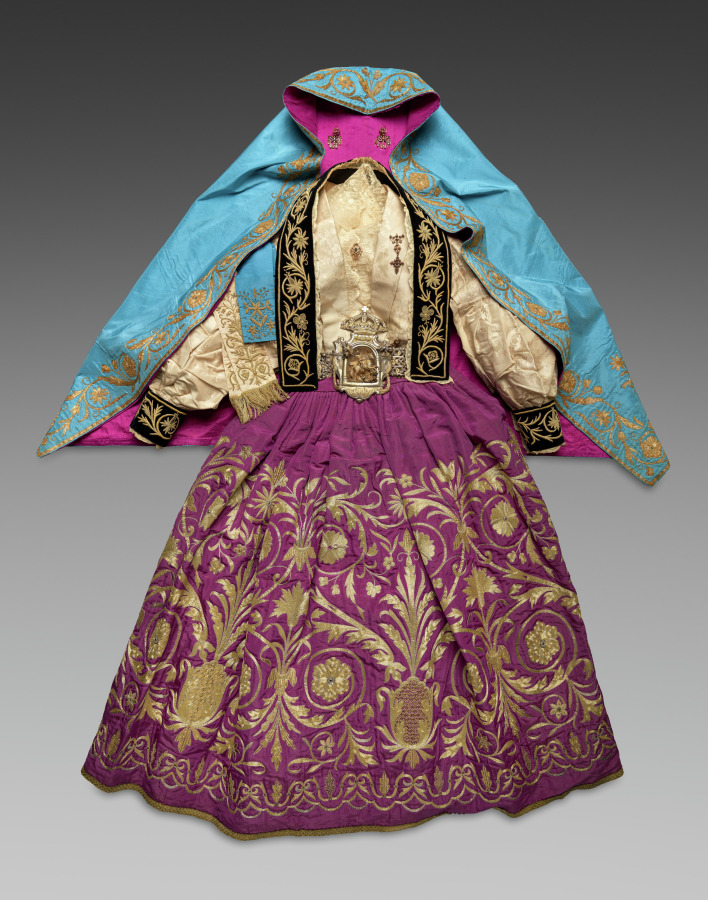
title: Woman's Costume used in Religious Procession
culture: Italy, Sicily, 19th century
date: 1800s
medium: white silk damask; white silk with metal thread embroidery and sequins; purple and blue plain weave silk with metal thread embroidery and sequins; black velvet with metal thread embroidery and lace edging; machine embroidered net; plain weave white cotton with embroidery; silver; gold; jewels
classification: Garment